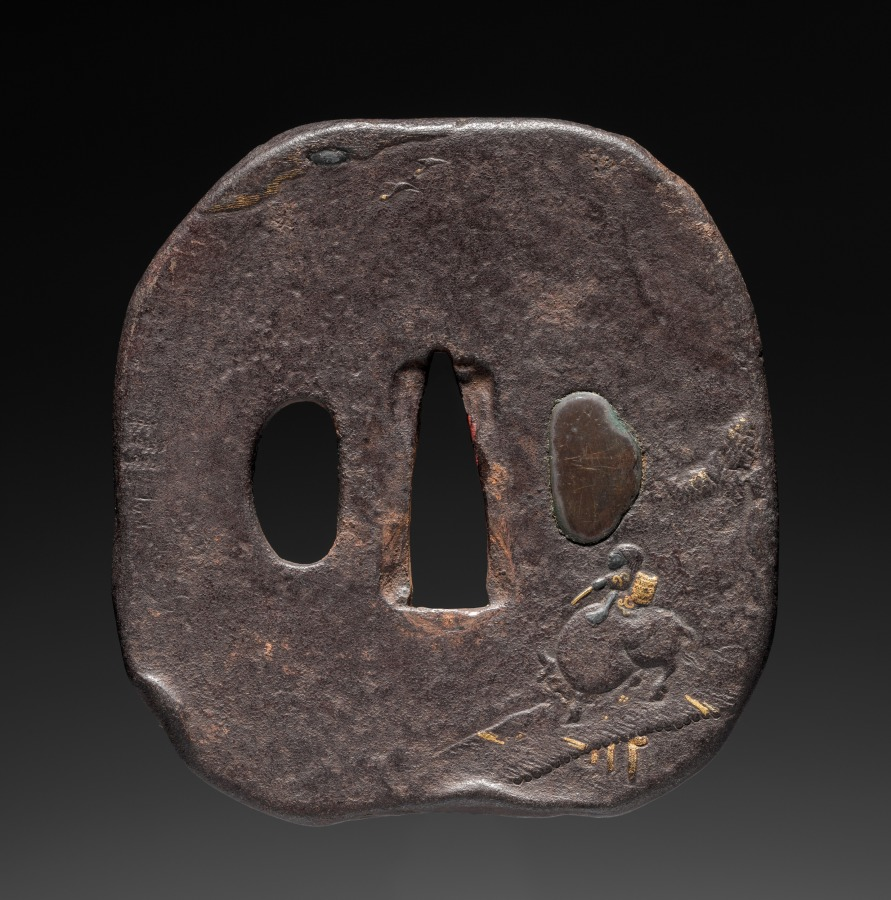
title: Sword Guard (Tsuba) with Oxherd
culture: Japan, possibly Edo period (1615-1868)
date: c. 1615–1868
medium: iron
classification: Arms and Armor